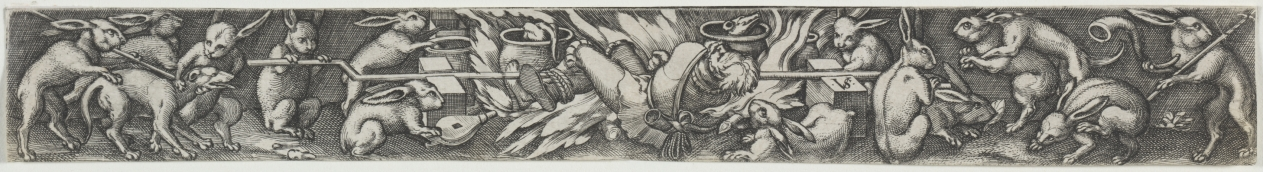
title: Rabbits Roasting a Hunter and His Dogs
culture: Germany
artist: Virgil Solis (German, 1514–1562)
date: mid-1500s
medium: engraving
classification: Print